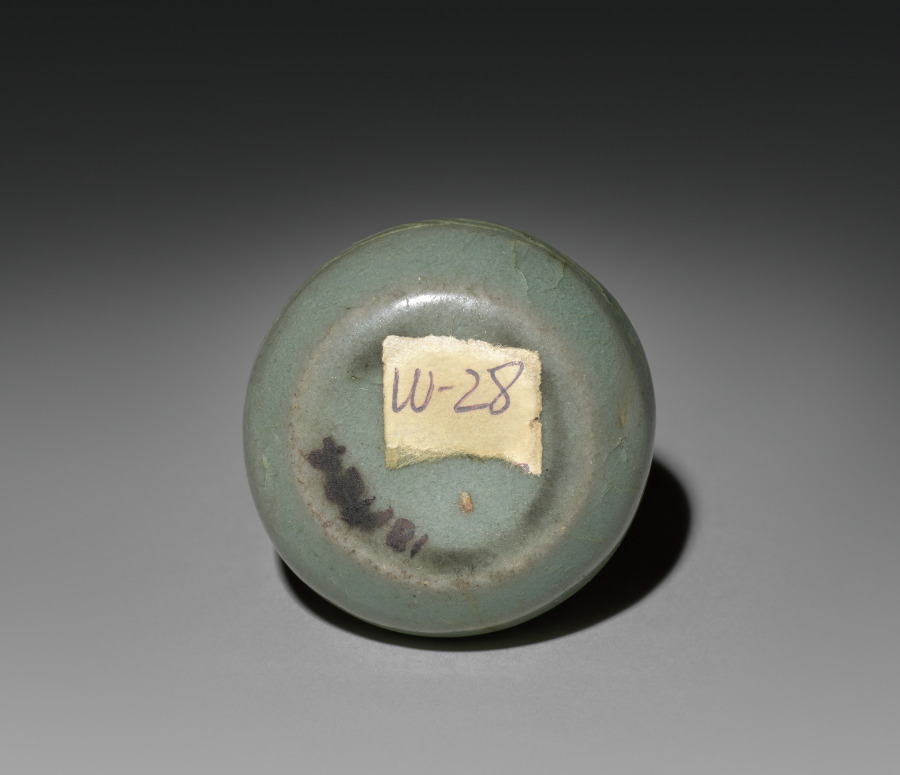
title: Box and Cover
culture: Korea, Goryeo dynasty (918–1392)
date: 918–1392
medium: celadon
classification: Ceramic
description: Celadons, spoons, seals, and bronze mirrors were the most common burial objects in tombs during the Goryeo period (918-1392). Once used to contain color powder, rouge and eyebrow gel for makeup, this small container was one of the standard goods that furnished elites' tombs. Goryeo-period women and men used the grain powder of rice or millet for whitening their skin, safflower extract for rouge, and plant ash or soot for eyebrow gel. Yet, natural-looking make-up seems to have been the most favorable one in Korea according to the travelogue by Xu Jing (1091-1153), the Chinese diplomat who visited Korea in 1123.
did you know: This ceramic container was used to store either incense or cosmetics.